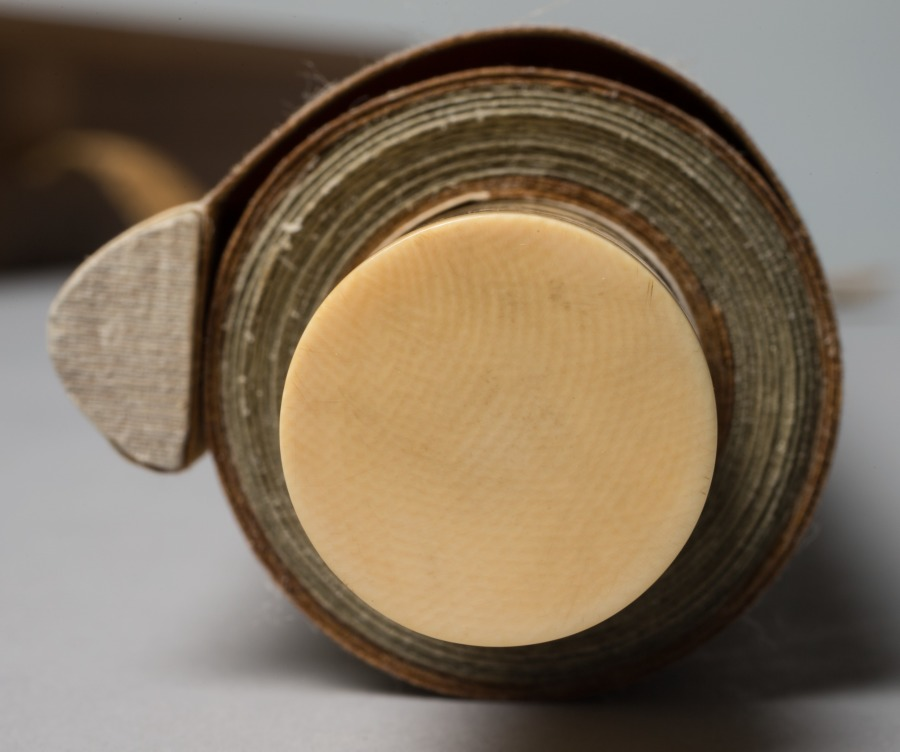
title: Minamoto no Nakakuni Visits Lady Kogō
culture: Japan, Edo period (1615–1868)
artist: Kiyohara Yukinobu (Japanese, 1643–1682)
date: late 1600s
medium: One of a triptych of hanging scrolls; ink and color on silk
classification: Painting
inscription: 款記「清原氏女雪信筆」/「清原女」朱文八角印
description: Kiyohara Yukinobu was one of Japan's earliest and most talented female painters. Kiyohara preferred Japanese style painting techniques and subjects. Her work depicts the scenery and history of her native land. In addition to the tonalities of ink, she applied a delicate range of colors. These help identify the seasons, an important theme in Japanese life and culture.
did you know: This central painting from a triptych presents an episode from The Tale of the Heike in which Minamoto no Nakakuni is sent by the emperor to look for Lady Kogō.